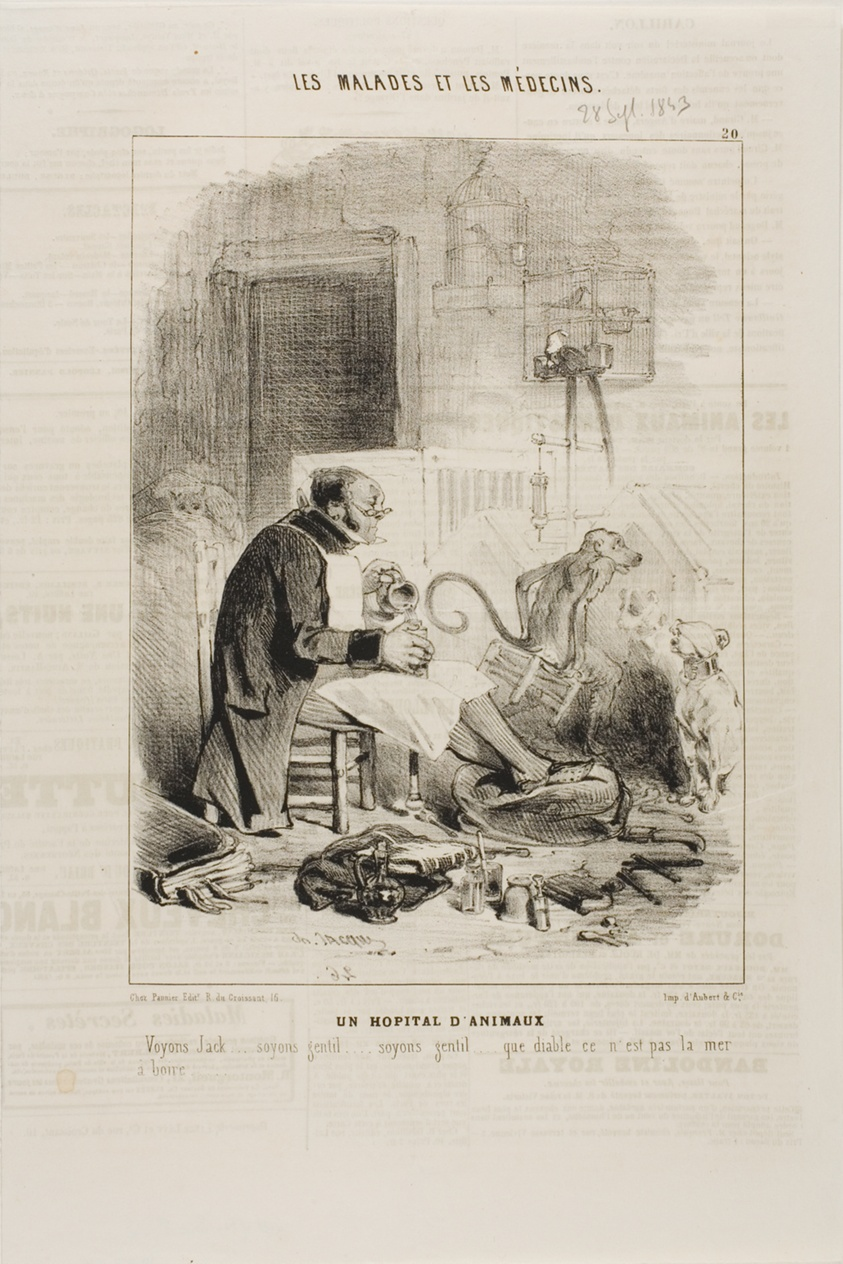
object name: Print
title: An Animal Hospital (plate 20)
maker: Charles Émile Jacque (French, 1813-1894)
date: 1843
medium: Lithograph in black on ivory wove paper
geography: France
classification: lithograph; print; prints and drawing